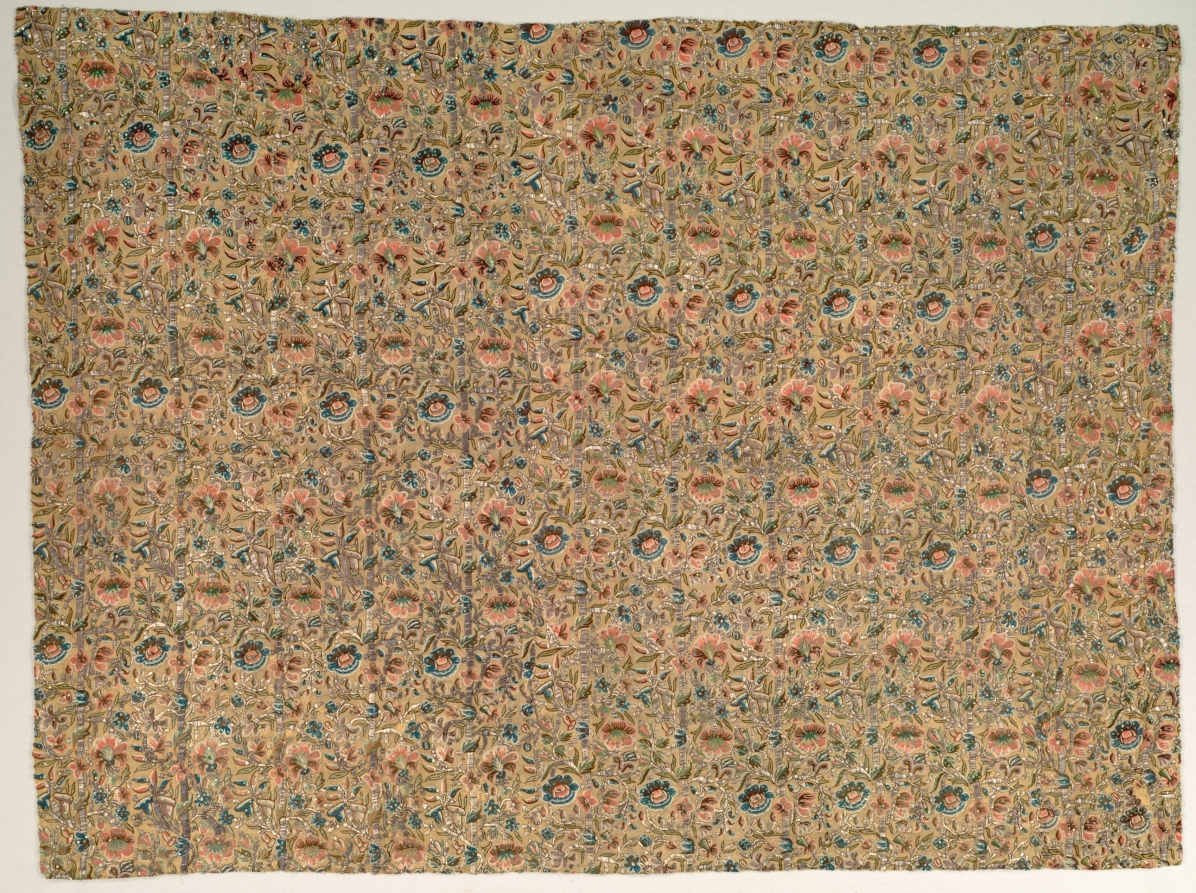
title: Embroidered Textile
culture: Turkey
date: 1700s–1800s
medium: Wool: silk and metal threads embroidery; cotton backing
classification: Embroidery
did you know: The surface is embellished with sequins, seemingly added at random.